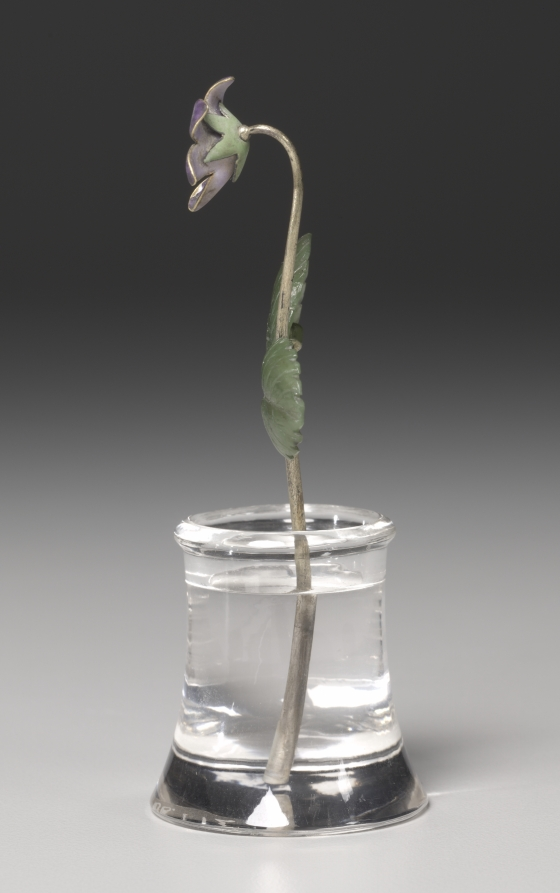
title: Flower Study of a Violet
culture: Russia, St. Petersburg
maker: House of Fabergé (Russian, 1842–1918)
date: c. 1885–1915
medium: enamel, silver gilt, jade, diamond, rock crystal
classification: Miscellaneous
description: This flower study depicts a single stem of violet. Fabergé’s inspiration for his flower studies is said to have come from the floral brooches of precious stones that were made in the 1700s for Catherine the Great as well as from the Japanese art of flower arranging, known as ikebana. Small and delicate, Fabergé’s flower studies were given as intimate gifts to friends by the tsarina and others in the court. She also liked to take them around to wherever the imperial family was residing as a reminder of spring during the harsh Russian winters.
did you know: The stems of Fabergé’s flower studies are set into little basins carved from rock crystal to resemble pots of water.